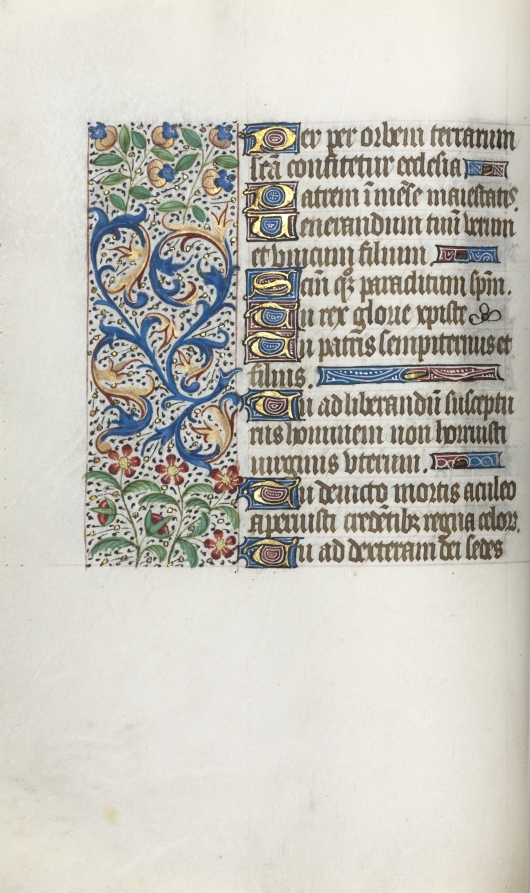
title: Book of Hours (Use of Rouen): fol. 37v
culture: France, Rouen, 15th century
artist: Master of the Geneva Latini (French, active Rouen, 1460–80)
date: c. 1470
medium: ink, tempera, and gold on vellum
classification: Bound Volume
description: In the late 1400s and early 1500s Rouen was an established and important center of book production. The city’s cathedral had a wealthy chapter that spent large sums of money to commission books and to maintain its extensive library. The stationers and booksellers would have likely been concentrated in or near the cathedral precinct. This artist, named after a manuscript now in Geneva, was Rouen’s principal illuminator during the second half of the 1400s.